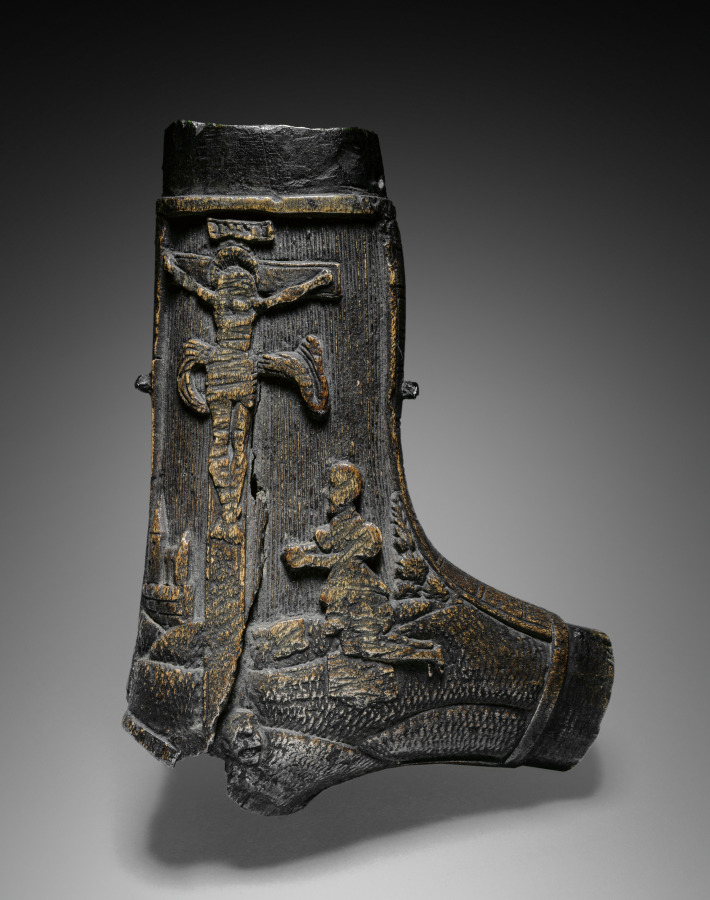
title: Powder Flask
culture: Germany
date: c. 1550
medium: carved staghorn (two branches); mounts missing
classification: Arms and Armor